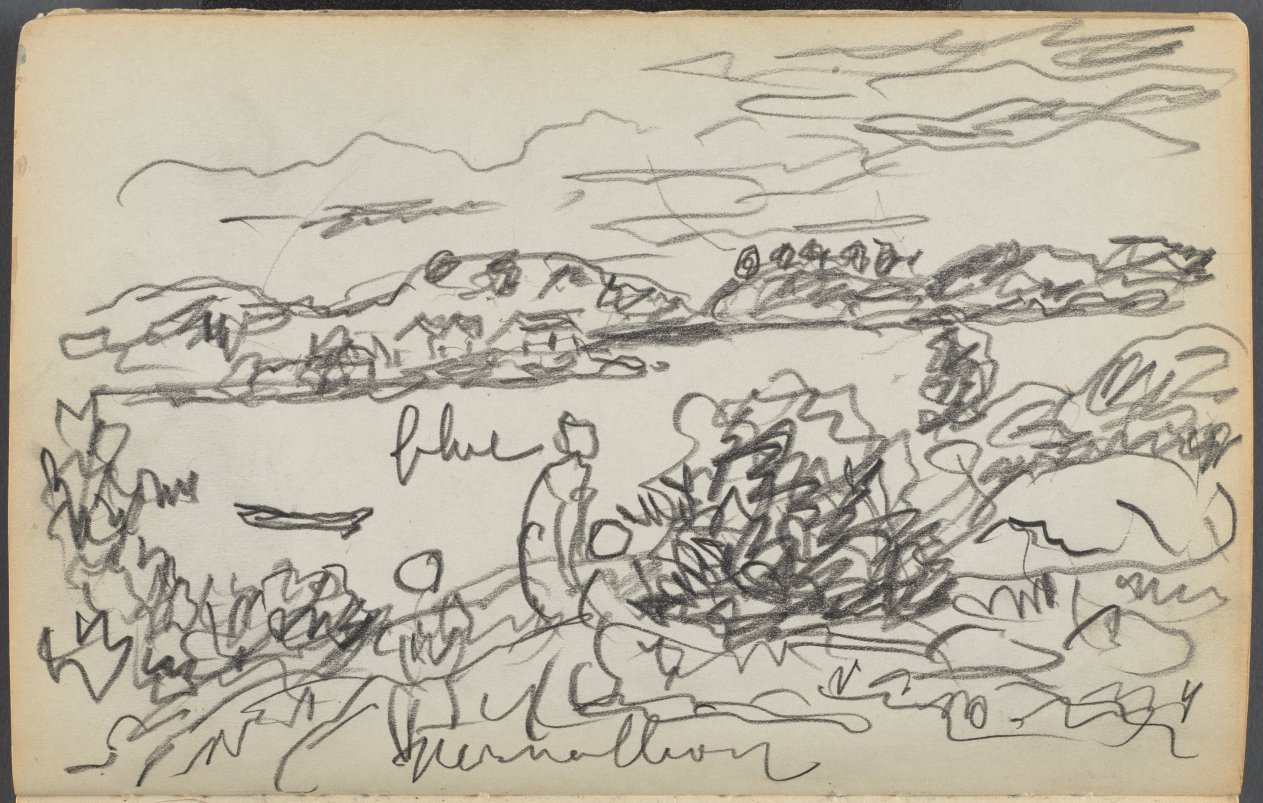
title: Sketchbook- The Granite Shore Hotel, Rockport, page 020: Harbor View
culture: America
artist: Maurice Prendergast (American, born Newfoundland [now Canada], 1858–1924)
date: c. 1916/19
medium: graphite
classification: Bound Volume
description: This sketchbook contains 72 pages of pencil drawings and 9 watercolors of Cape Ann. On the inside of the cover Prendergast wrote the address of the Granite Shore Hotel in Rockport, Massachusetts.